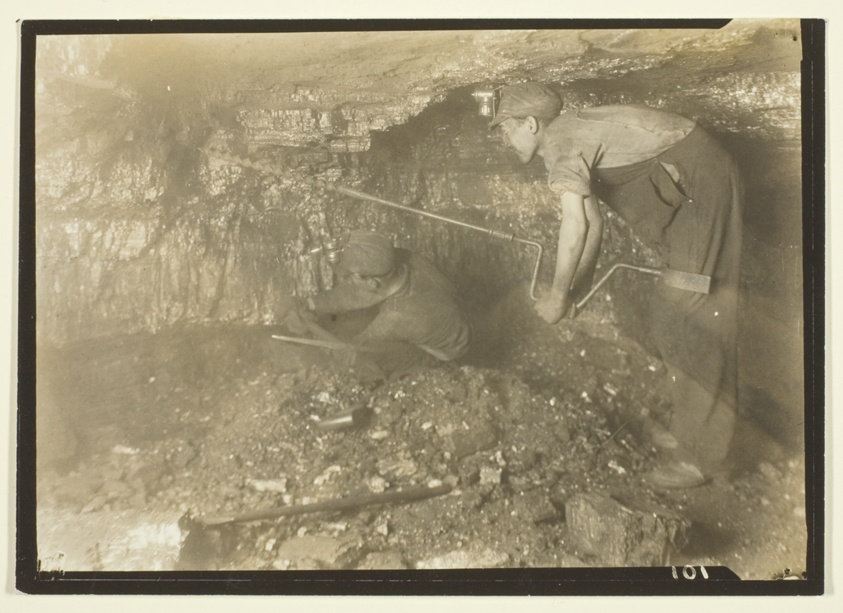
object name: Photograph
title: Drilling For A Shot: Old-Fashioned Way Of Mining Coal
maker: Lewis Wickes Hine (American, 1874–1940)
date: 1921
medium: Gelatin silver print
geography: United States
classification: gelatin silver (developing-out-paper) pr; photographic process; photography; photograph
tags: Collected by Hugh Edwards, documentary